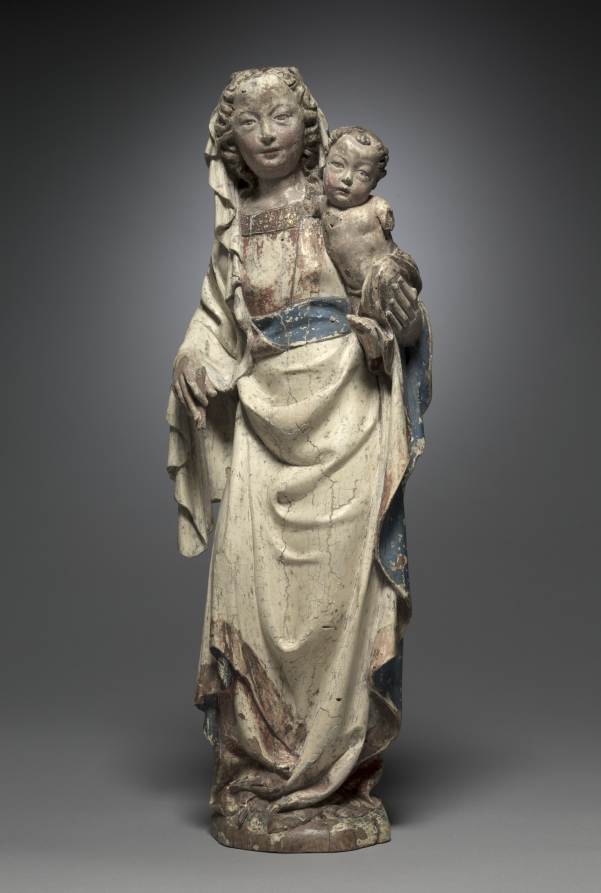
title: Virgin and Child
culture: Austria, Diocese of Passau, 14th century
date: c. 1370–1380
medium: painted lindenwood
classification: Sculpture